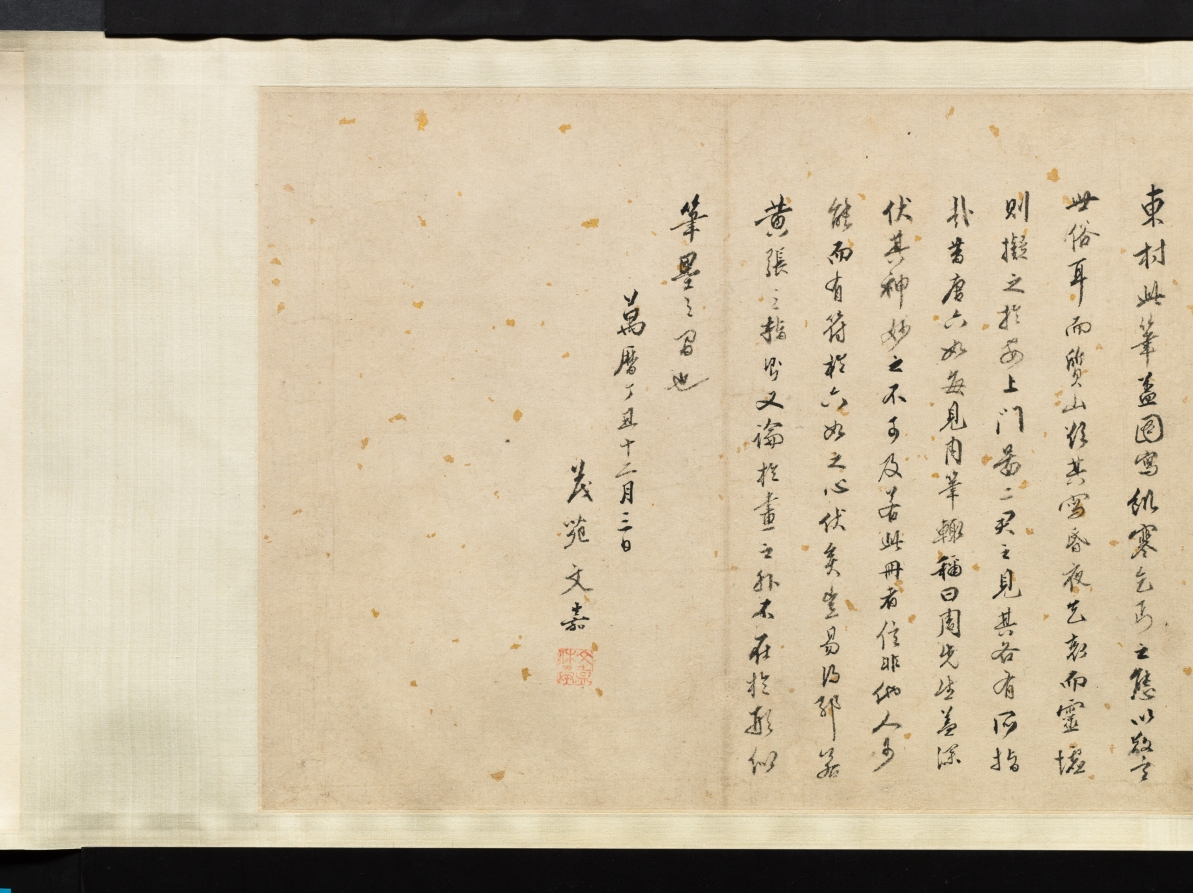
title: Beggars and Street Characters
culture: China, Ming dynasty (1368–1644)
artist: Zhou Chen (Chinese, c. 1450–c. 1536)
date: 1516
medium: Handscroll; ink and light color on paper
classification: Painting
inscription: 題: 周臣流氓圖. 古堇趙鶴琴 [印] 老鶴臨池; 鵝池軒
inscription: 正德丙子秋七月，閒窗無事 ，偶記素見市道丐者種種態度。乘筆硯之便，率爾圖寫。雖無足觀，亦可以助警勵世俗云。 東邨周臣記 [印]東邨; 舜卿; 鵝場散人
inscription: 吳中東邨周君，善丹青，尤長於人物。此圖其所見盛市丐者之狀種種，各盡其態，觀者絕倒。嗟乎，今之晝夜乞哀以求富貴者，安得起周君而貌之耶。臥雲徵君出示，余漫題其後。 甲子歲十月吳門黃姬水 [印] 士雅山人; 另一印不詳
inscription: 是冊凡數種。其飢寒流離疲癃殘疾之狀，種種之異。觀此而不惻然心傷者，非仁人也。計正德丙子逆瑾之流毒已數年。而[江]彬 [錢] 寧輩肆虐方熾。意分符剖竹諸君，亦鮮有能撫字其民者。然則舜卿此作，殆與鄭君 流民圖同意。其有補於治道者不淺，要不可以墨戲忽之也。 長洲張風翼題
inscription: 東村此筆，蓋圖寫飢寒乞丐之態，以警世俗耳。而質山 [黃姬水]欲其寫昏夜乞哀，而靈墟[張鳳翼]則擬之於安上門圖。二君之見，其各有所指哉。昔唐六如每見周筆，輒稱曰：周先生！蓋深服其神妙之不可及。若此冊者，信非他人可能而有符於六如之心伏矣。豈易得耶。若黃、張之指，則又論於畫之外，不在於形似筆墨之旨也。 萬歷丁丑十二月三日 茂苑文嘉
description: Zhou Chen from Suzhou provides rare depictions of impoverished people that once filled the city’s markets and streets. Despite Suzhou’s prosperity, its rapid growth polarized society, including the wealthy and those who had deserted their farmlands, who were without homes, unemployed, or sick. Amid these are figures who inspire fear rather than empathy. The painting may thus be informed by local practices at the end of the lunar year, in which street beggars, in exchange for food or money, would dress up like ghosts and demons to drive out evil forces.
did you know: Although Zhou Chen's original composition was an album of 24 figures, today it is mounted as two handscrolls, one in the Cleveland collection and one in the Honolulu Museum of Art.